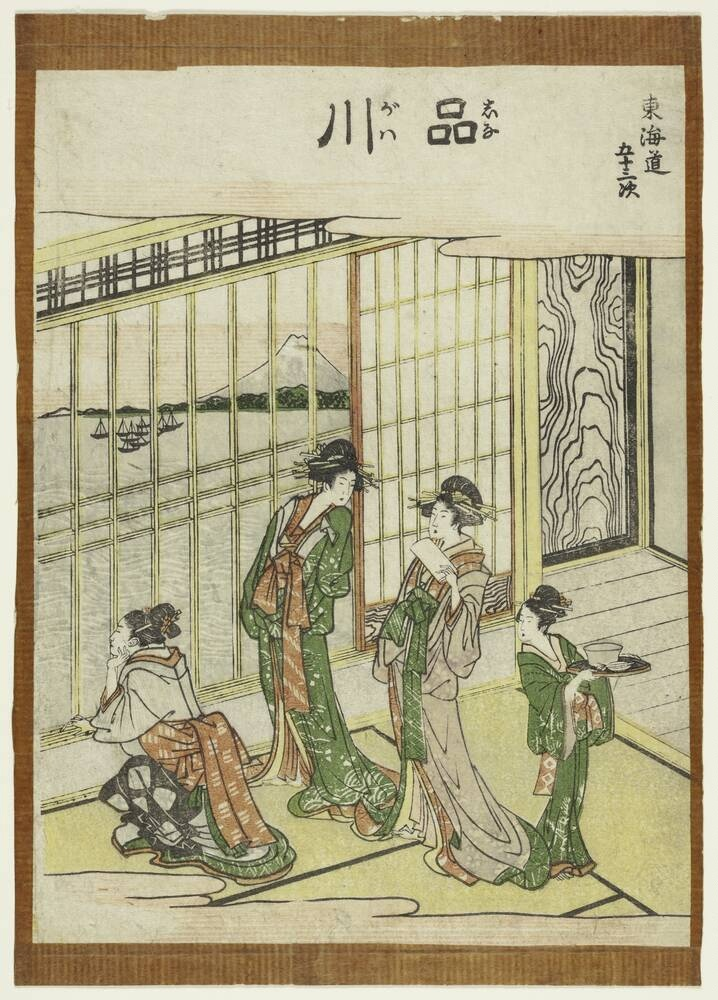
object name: Print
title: Shinagawa, from the series "Fifty-three Stations of the Tokaido (Tokaido gojusan tsugi)"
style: Japanese (culture or style)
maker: Katsushika Hokusai 葛飾 北斎; Japanese, 1760-1849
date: c. 1806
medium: Color woodblock print; chuban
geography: Japan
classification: woodblock print; print; asian art